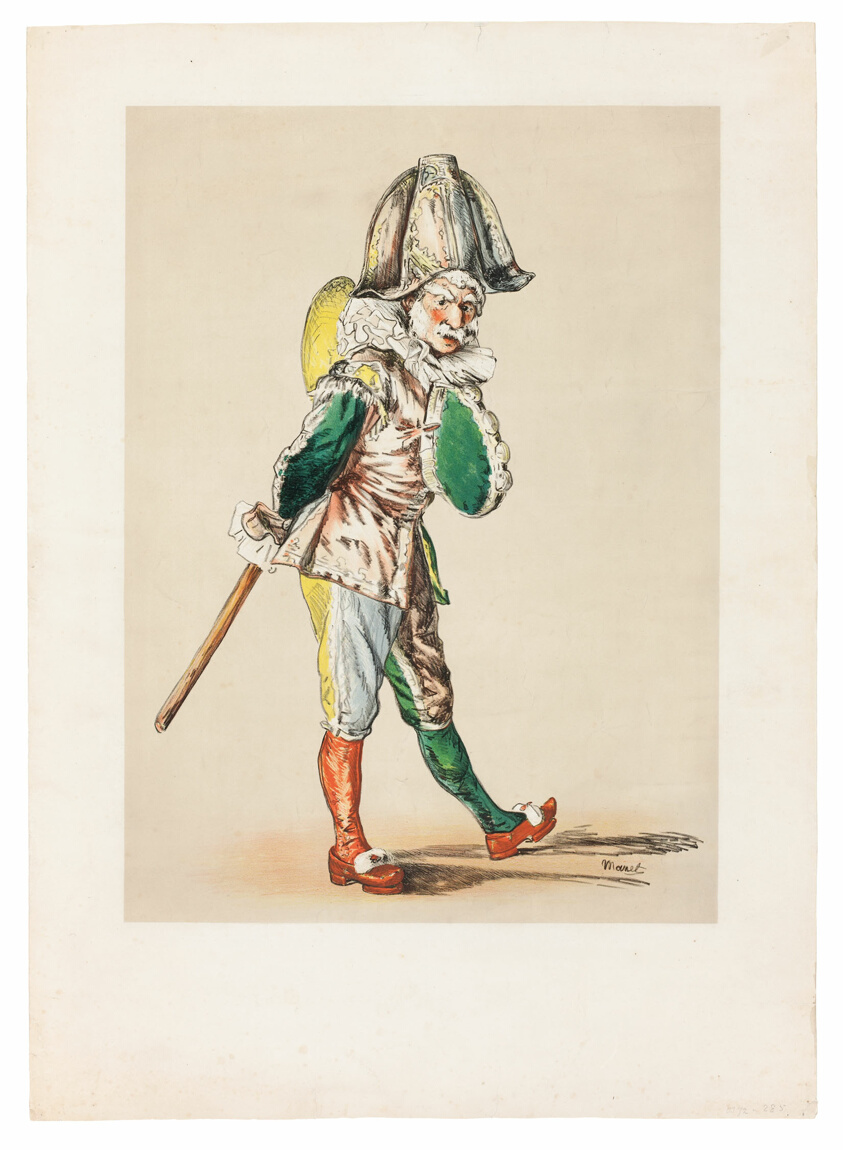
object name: Print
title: Punch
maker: Édouard Manet (French, 1832-1883)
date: 1874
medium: Lithograph printed in color from seven stones (beige, orange, green, yellow, light blue, white, black), with scraping, on ivory wove paper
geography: France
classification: lithograph; print; prints and drawing